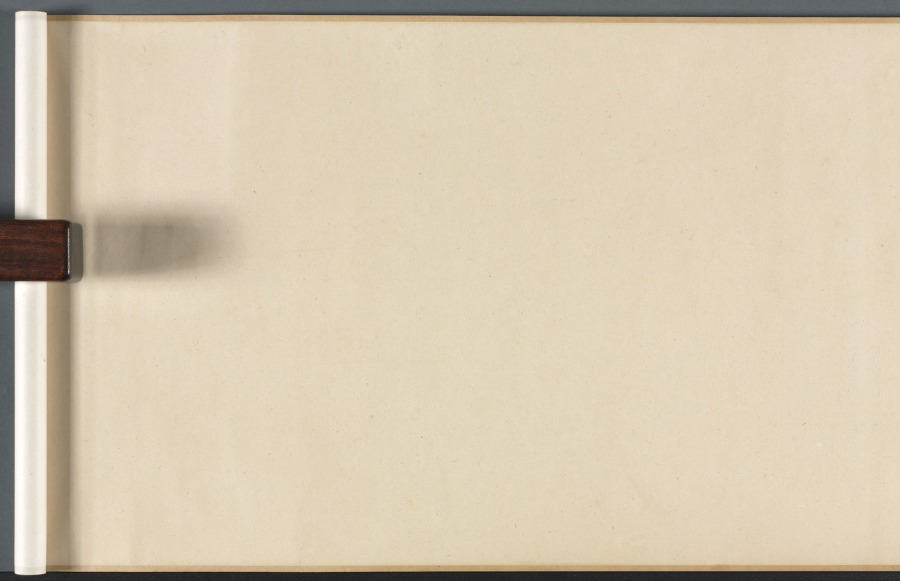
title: Water Village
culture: China, Ming dynasty (1368–1644)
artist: Wen Boren (Chinese, 1502–1575)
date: 1570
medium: handscroll; ink and light color on paper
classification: Painting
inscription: 隆慶庚午秋仿趙文敏筆. 五峰文伯仁 [印] 五峰山人; 文伯仁印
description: In the autumn of 1570, Wen Boren painted this seemingly unemotional scene of low-lying marshlands with a chain of rounded mountains in the background. A fishing boat is nestled on the shore near the village. Although paths and bridges traverse the landscape, only two people are visible in the stillness. From the restrained atmosphere of this landscape, one would never guess that Wen Boren was known as the “bad boy” of the Wu School for his explosive temper. As a younger man, he was even embroiled in a contentious lawsuit with his own uncle, Wen Zhengming (1470–1559), a master of Ming dynasty painting with whom he had trained. The ideal of the scholar-painter, or literati, was that an artist’s moral character is reflected in his paintings, so there was great incongruity between Wen Boren’s difficult personality and his restrained landscapes. A contemporary, Wang Shizhen, wrote this about him: "This gentleman is prone to behave odiously and screamed accusations at people. How is it possible for him to carry in his bosom such a wealth of scenic wonders?" Who knows what effort it took to subdue his fractious spirit to project an image of coolness and refined taste in his paintings?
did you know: A foreground tree has an eccentric twisting silhouette and pepper-dot "halo" of leaves.